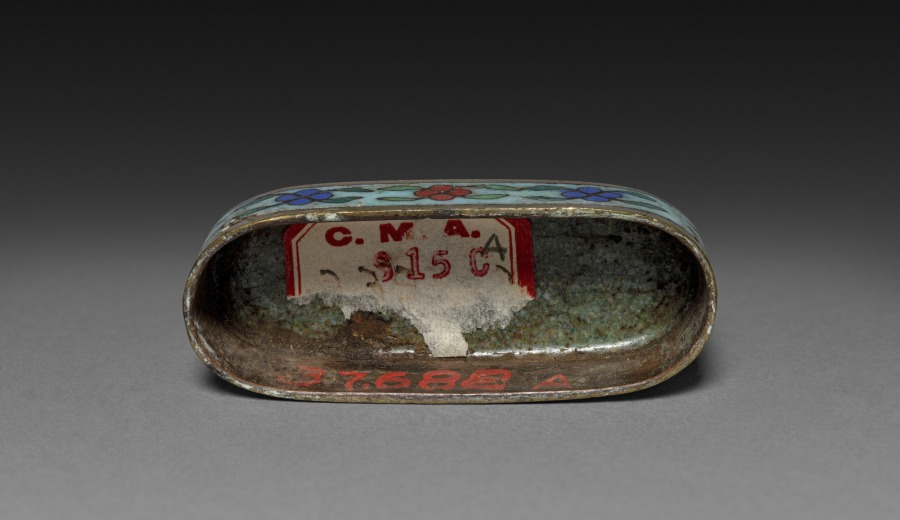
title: Box with Scholar's Accoutrements (lid)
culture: Japan, Meiji period (1868–1912)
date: late 1800s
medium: cloisonne enamel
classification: Enamel